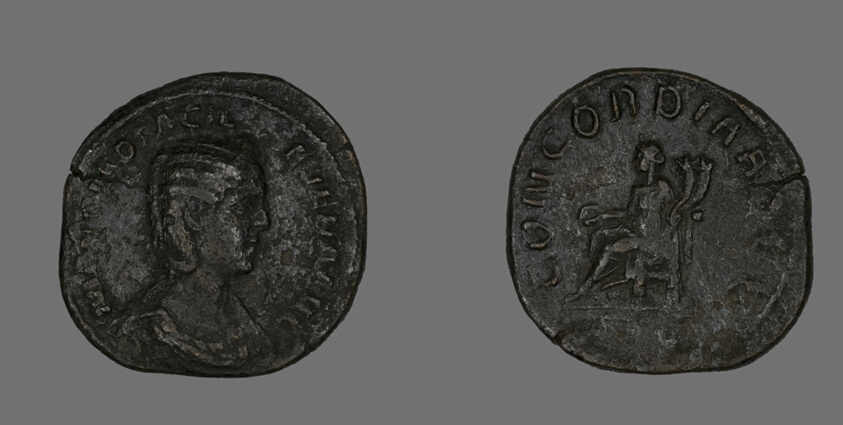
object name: Coin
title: Sestertius (Coin) Portraying Empress Marcia Otacilia Severa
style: roman (ancient, style or period), ancient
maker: Roman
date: 244-249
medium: Bronze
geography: Roman Empire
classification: coin; ancient art